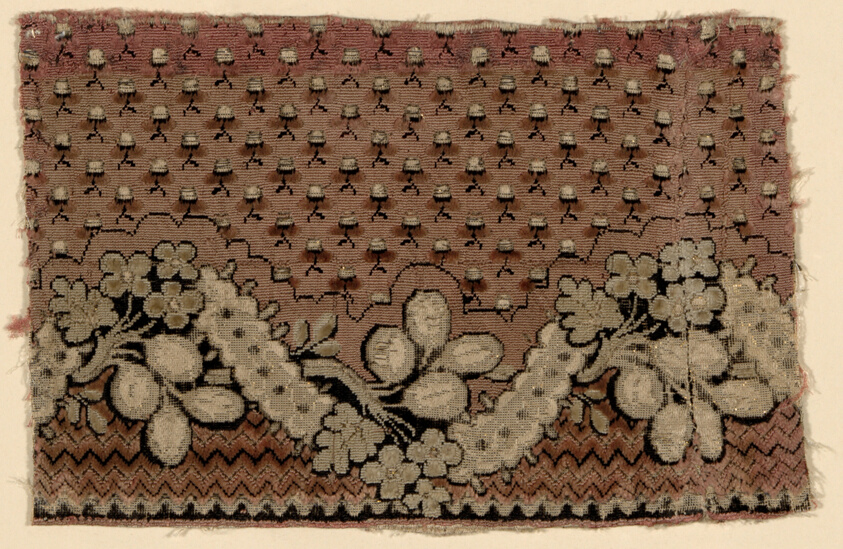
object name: Textile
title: Fragment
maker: France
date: 1750/75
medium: Silk, cut, uncut, and voided velvet with additional patterning wefts of gold foil tied at intervals against twill weave foundation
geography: France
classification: textile; weaving - velvet